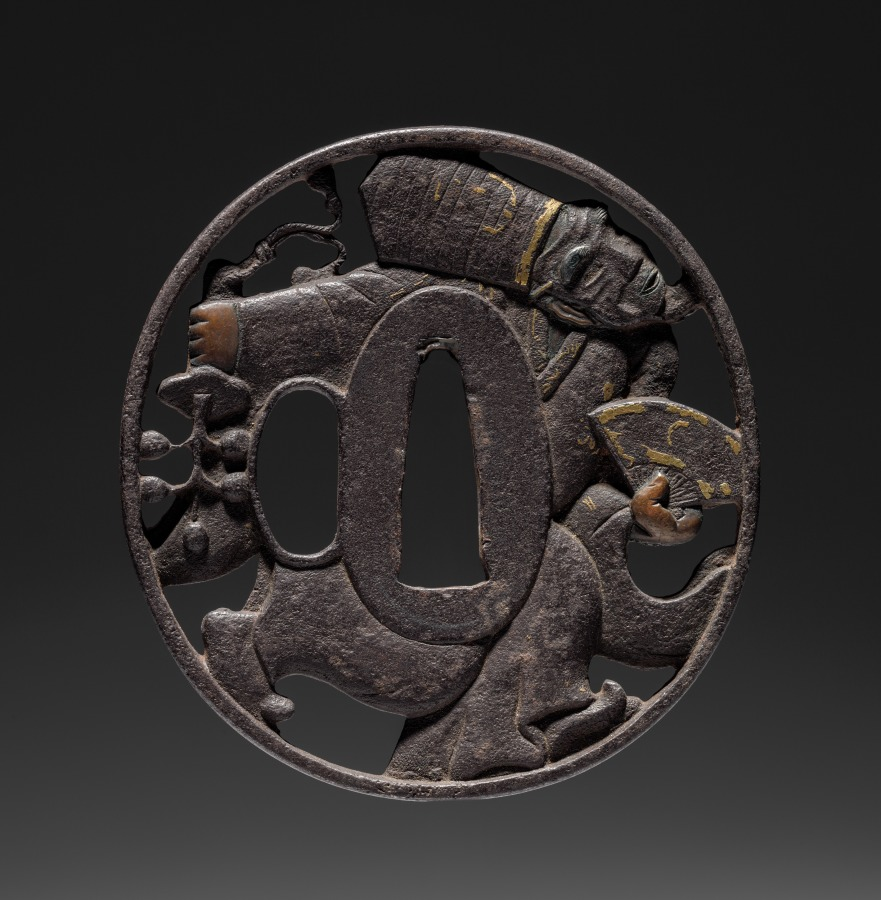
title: Sword Guard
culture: Japan, possibly Edo period (1615-1868)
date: c. 1615–1868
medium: iron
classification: Arms and Armor